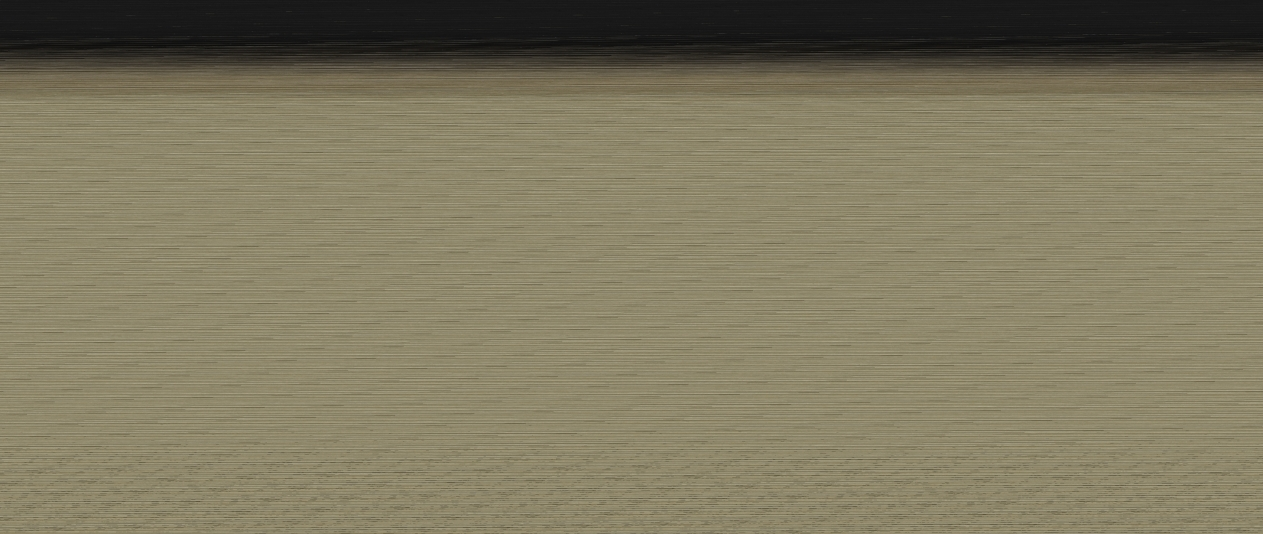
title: Landscape, The Palace of the Clouds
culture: China, Qing dynasty (1644-1911)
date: 1644–1911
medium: handscroll, ink on silk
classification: Painting